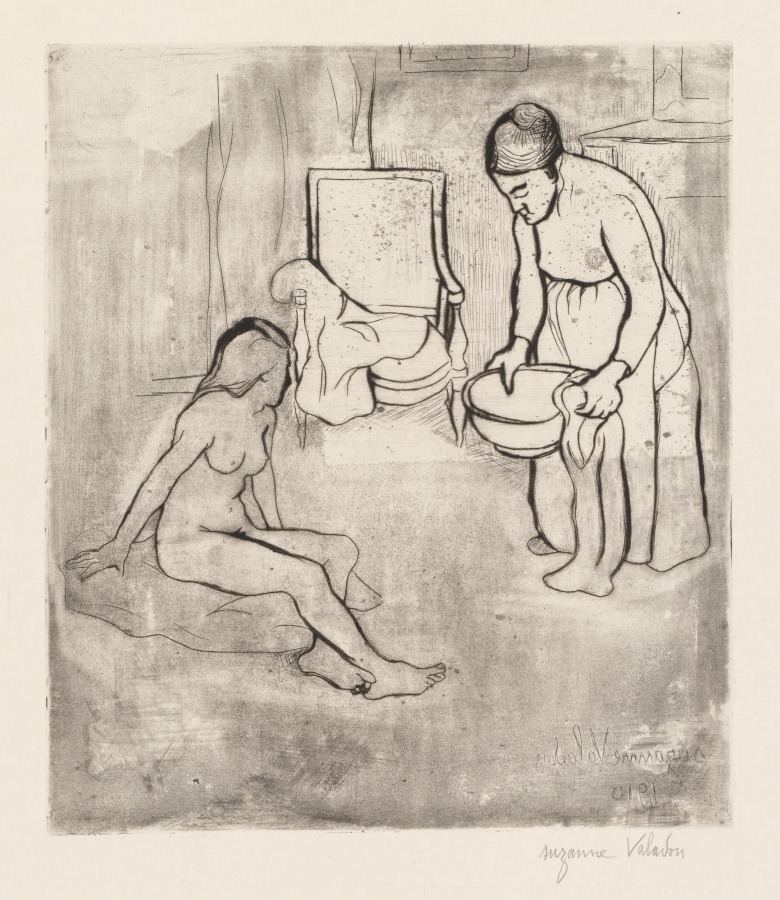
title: Grandmother with Louise, Nude Seated on the Floor (Grand-Mère et Louise Nue Assise par Terre)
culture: France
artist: Suzanne Valadon (French, 1865–1938)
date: 1910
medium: Drypoint, etching, and aquatint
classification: Print